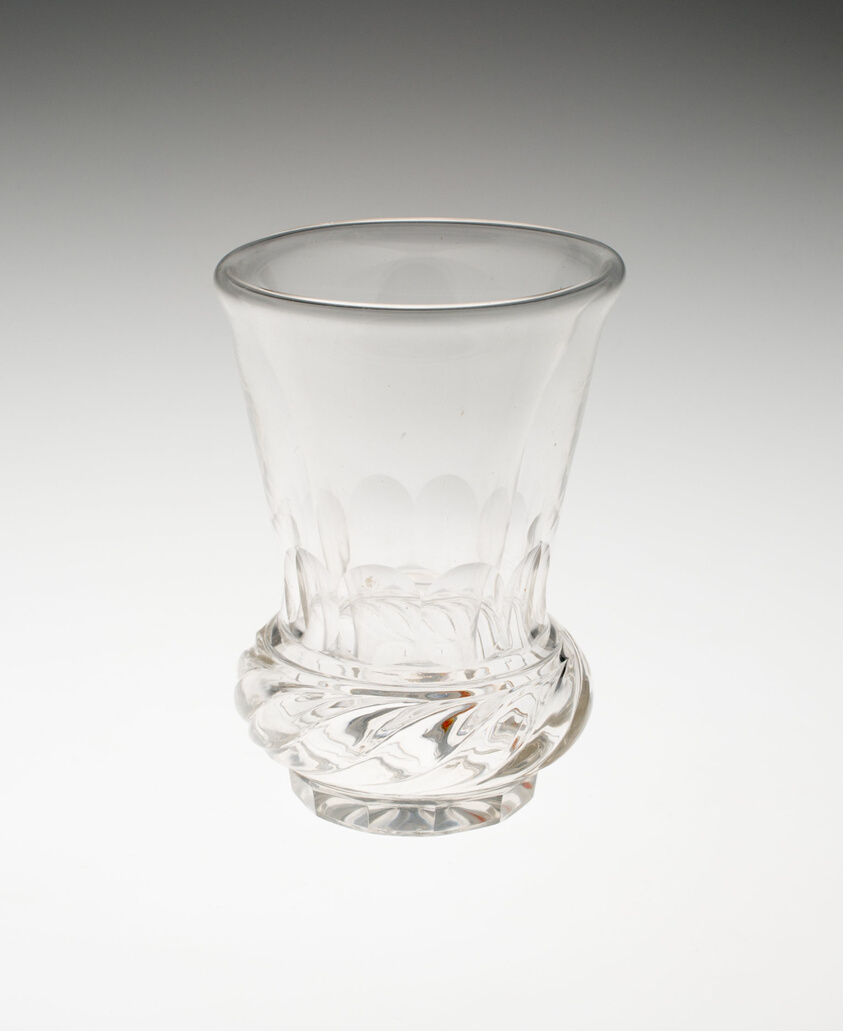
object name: Glass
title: Trick Glass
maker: Germany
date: Early 19th century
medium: Glass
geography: Germany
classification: glass; european decorative arts